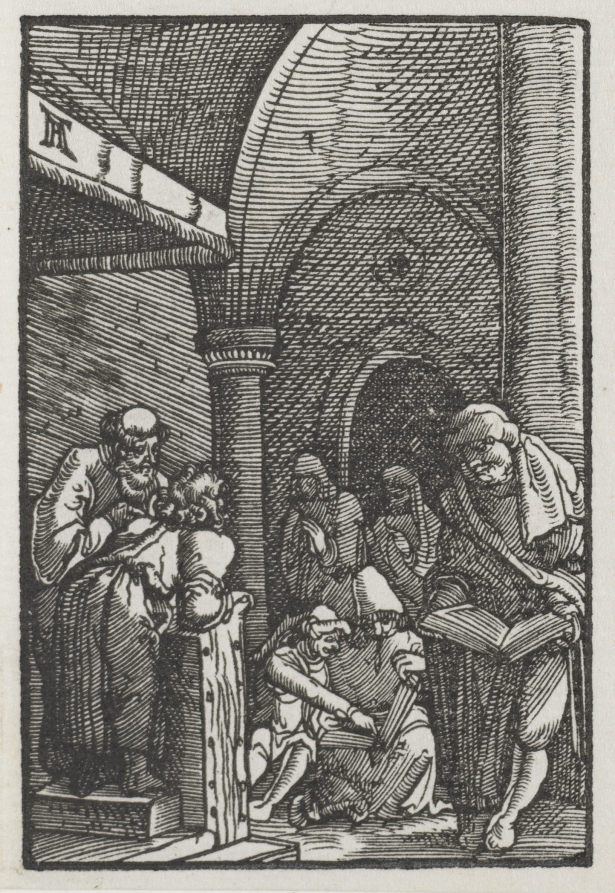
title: The Fall and Redemption of Man: Christ Disputing with the Doctors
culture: Germany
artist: Albrecht Altdorfer (German, c. 1480–1538)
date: c. 1515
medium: woodcut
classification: Print